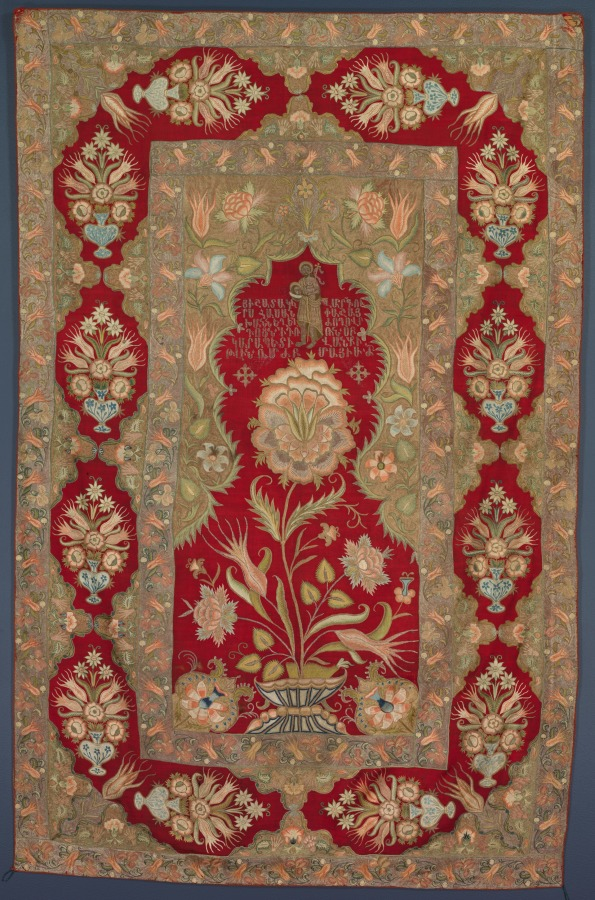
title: Embroidered Armenian liturgical curtain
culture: Turkey, Constantinople/Istanbul, Ottoman period (1299–1922)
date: 1763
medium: twill weave: wool; embroidery, chain stitch: silk, gilt- and silver-metal thread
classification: Textile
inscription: Inscription embroidered in erkatagir script with metal thread reads: "This curtain (varakouyr) is in memory of the people of Hassan Pasha Khan who gave it to the Monastery (vank) of Saint John the Baptist (Surp Garabed) on the Armenian date 10 May 1212 (1763 AD)."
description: This rare Ottoman embroidery features a floral bouquet that enriches the field under an elegant arch of gilt-metal thread. Flanked by vines of tulips and irises on a silver-metal-thread ground, vases of tulips and jonquils within cartouches adorn the main border and the well-turned corners, a sign of high quality. Dated 1763, the textile documents a mid-18th-century style and technique uncommon in Ottoman embroideries. The Armenian community commissioned this pattern for a liturgical curtain. Beneath the arch, Saint John the Baptist appears with a staff of victory, holding his own severed head in one arm and the Lamb of God in the other. The embroidered Armenian inscription reads: "This curtain is in memory of the people of Hassan Pasha Khan who gave it to the Monastery of Saint John the Baptist on the Armenian date 10 May 1212 [1763]."